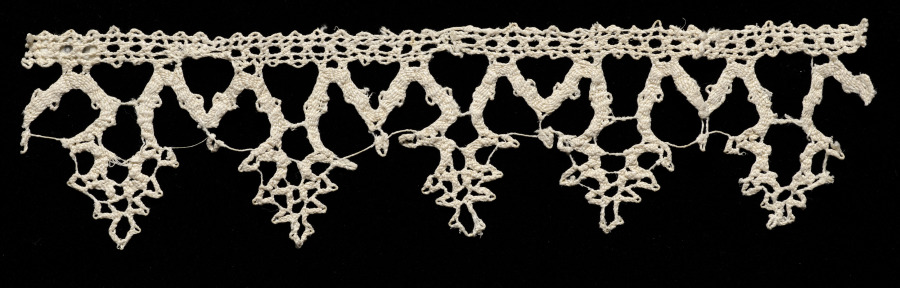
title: Lace Edging with Points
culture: Italy, Venice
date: early 1600s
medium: Bobbin lace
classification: Lace